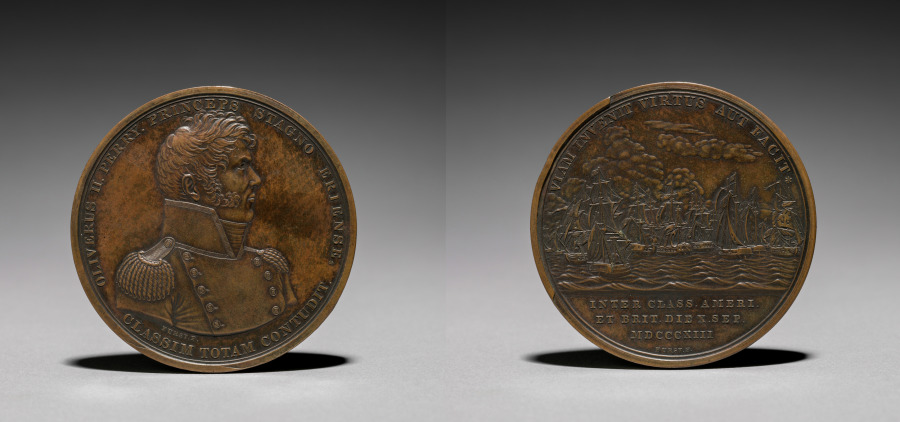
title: Medal Commemorating Commodore Oliver Hazard Perry (1785-1819) and the Battle of Lake Erie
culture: America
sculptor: Moritz Fürst (Hungarian, 1782–1882)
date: 1813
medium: bronze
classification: Metalwork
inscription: Oliverus H. Perry, Princips Stagno Eriense. blassim Totam Contudit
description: This medal commemorating the Battle of Lake Erie on 10 September 1813 is one of a series of 27 medals commemorating American successes during the War of 1812, struck by special resolution of Congress. These medals were awarded to naval commanders in gold and to their officers in silver. The bronze examples are restrikes.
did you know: The United States naval forces, led by Commodore Oliver Hazard Perry (1785-1819), won a decisive battle over the British.